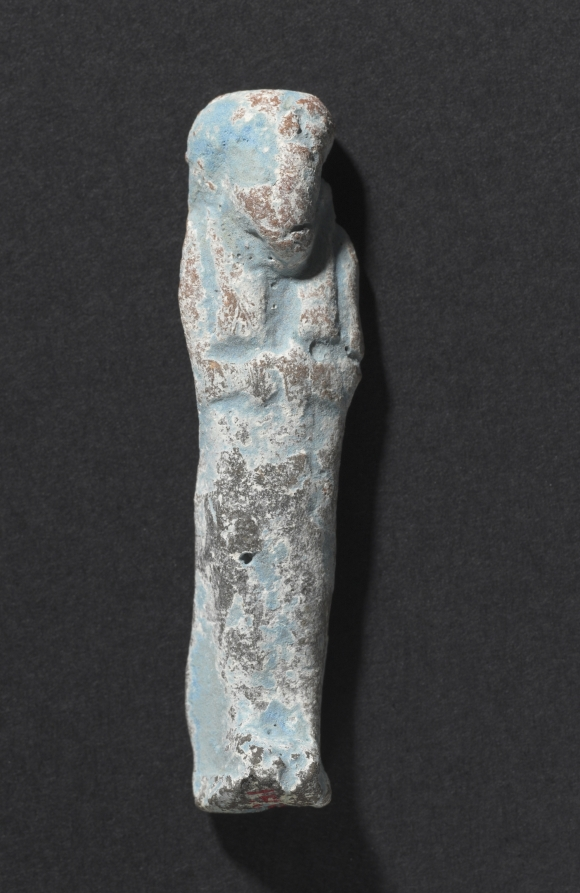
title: Shawabty of Ditamenpaankh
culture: Egypt, Late period (715–332 BCE), Dynasty 25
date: 715–656 BCE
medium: terracotta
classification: Funerary Equipment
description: High demand for shawabtys in the Late Period, a time when as many as 400 or more shawabtys were placed in the tomb with the deceased, gave rise to a specialized container for storing them: the shawabty box. This example is inscribed for the lady of the house, Ditamenpaankh, and was probably one of a pair originally made for her. The single-masted boat on the box's lid is perhaps an allusion to the pilgrimage of the deceased to the holy city of Abydos, the cult city of Osiris, king of the dead. The shawabtys inside are crude, mass-produced examples cast in an open mold. Made of terracotta, their blue paint imitates more costly shawabtys made of faience. As for the shawabty spell, it has been removed from its traditional location on the shawabty's front and relocated onto the sides of box, where it needed only to be written once, thus expediting production.